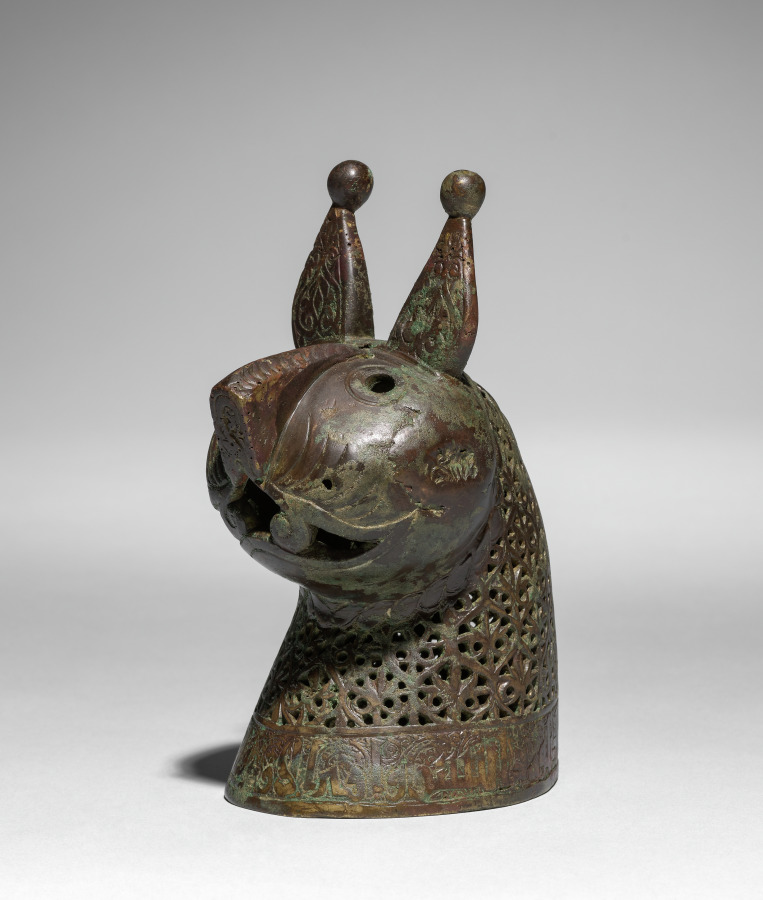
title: Head for a Feline Incense Burner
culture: Iran, Khurasan, Seljuq period of Iran (1037–1194)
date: 1150–1200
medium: Copper alloy, cast, engraved, chased, and pierced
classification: Metalwork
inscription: Qur'an sura al-jum'ah (The Friday Congregation) 62:9-10 (on neck and spine)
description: In Iran during the 1000s and 1100s, vessels in the shape of animals gained popularity, especially as incense burners. Felines were favored in Persian art and this piece may represent a caracal, a type of lynx. The head of the creature was cast separately and is removable to fill its body with hot coals and incense. Qur’anic verses on the neck and spine remind worshippers to set work aside, attend prayer, and then disperse to seek God’s bounty. The diffusion of perfumed smoke through the burner’s pierced palmette design may have served as a sensorial reminder of this teaching.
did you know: The head and body were each cast in halves that were soldered or welded together.